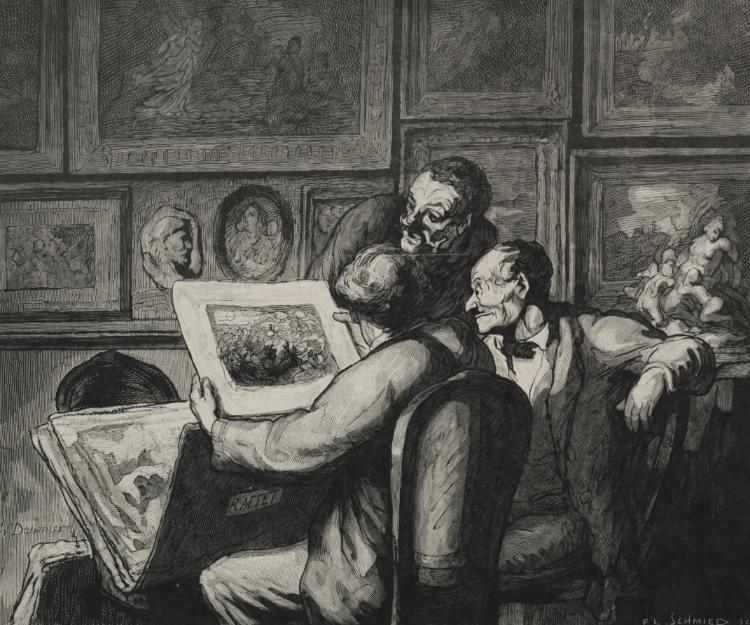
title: Print Enthusiasts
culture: France, 19th century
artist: after Honoré Daumier (French, 1808–1879)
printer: François Louis Schmied (Swiss, 1873–1941)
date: 1920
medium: wood engraving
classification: Print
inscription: In plate, lower left side: H. Daumier ; lower right corner: F L. SCHMIED SL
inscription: Lower margin, in pencil: 65/75 ; red stamp: FLS